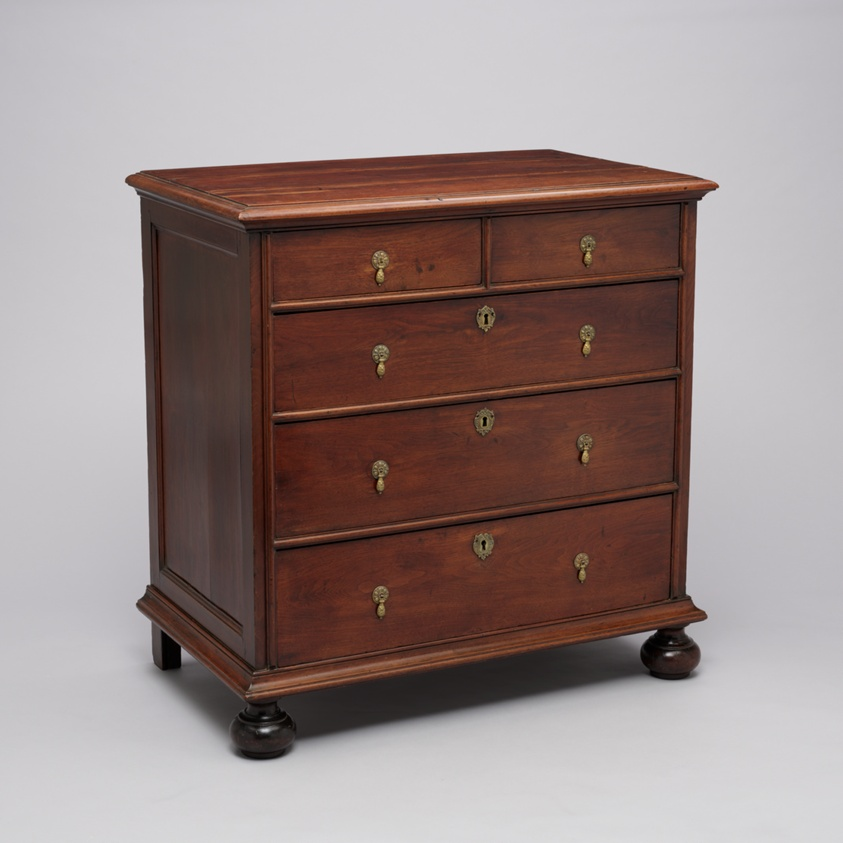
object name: Furniture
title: Chest of Drawers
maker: Artist unknown (American, 18th century); Pennsylvania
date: 1700–30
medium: Walnut, tulipwood, and pine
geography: Pennsylvania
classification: case furniture; furniture; american decorative arts; american arts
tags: furniture